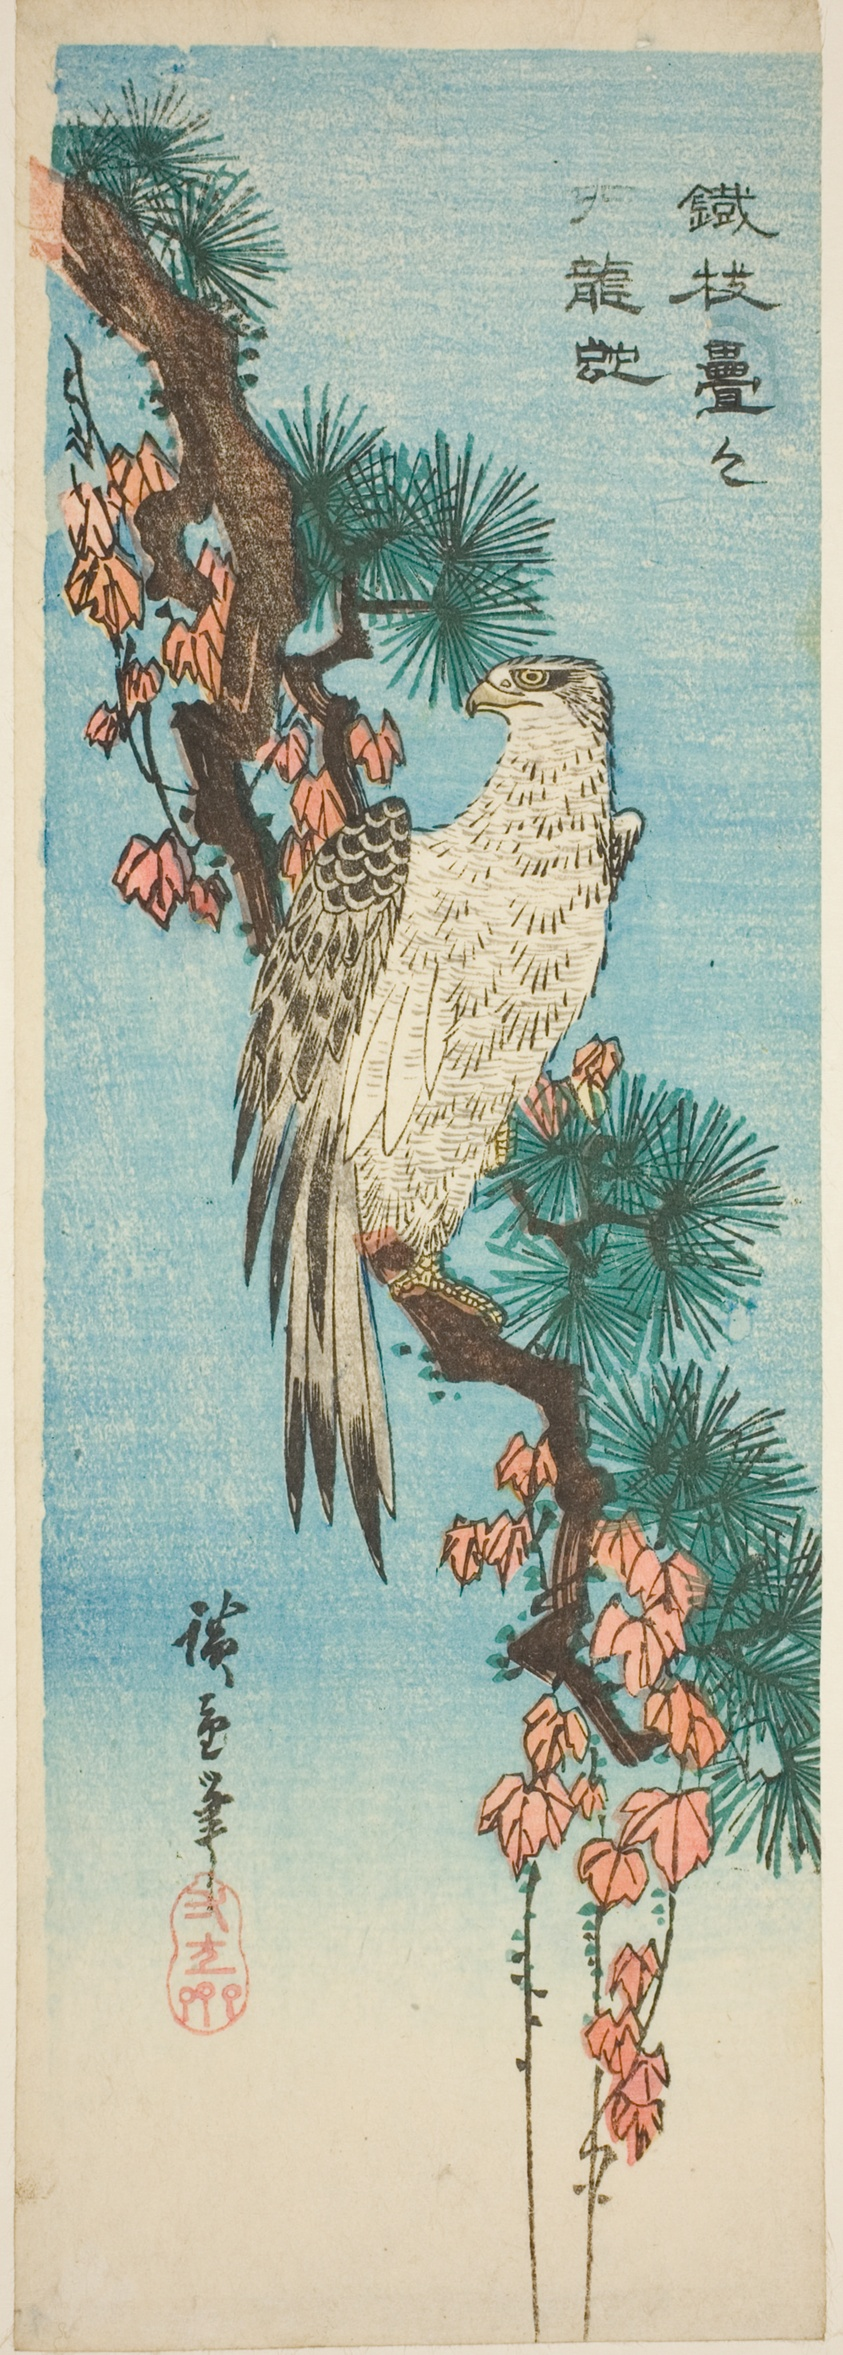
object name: Print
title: Falcon on ivy-covered pine branch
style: Japanese (culture or style)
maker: Utagawa Hiroshige 歌川 広重; Japanese, 1797-1858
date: 1830s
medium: Color woodblock print; aitazaku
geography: Japan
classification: woodblock print; print; asian art